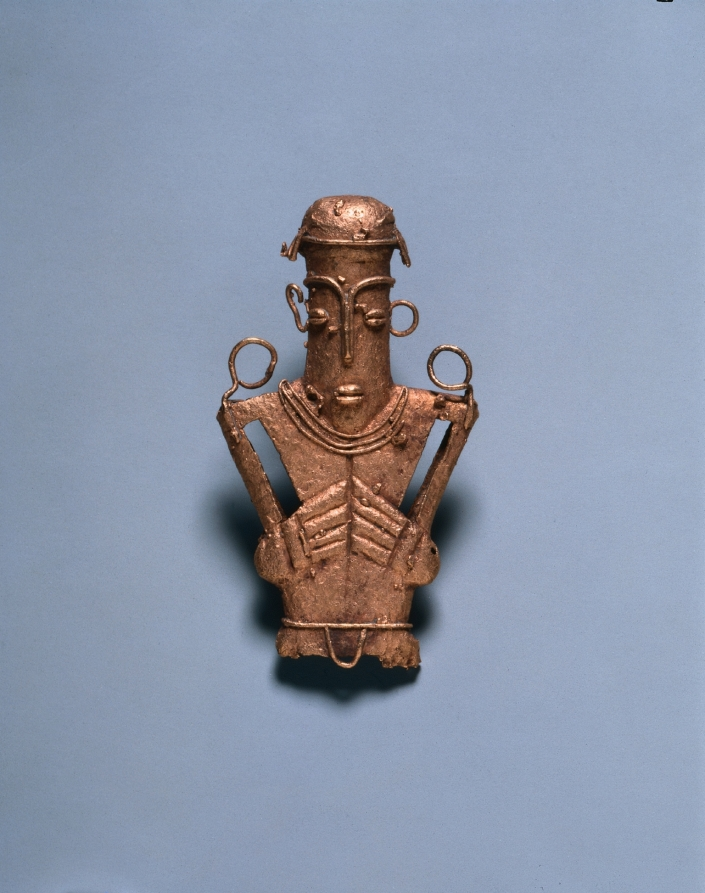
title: Tunjos (Votive Offering Figurine)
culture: Colombia, Muisca style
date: c. 900–1550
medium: cast gold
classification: Metalwork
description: Unlike the other gold ornaments in this gallery, tunjos were not worn; instead, they served as offerings that were deposited in sacred places, such as lagoons and caves. They often depict humans who hold something-here a container with a head (1947.22), a spear thrower (1947.19), and a bird-tipped (1957.25). The subject must have corresponded to a benefit being asked from the gods. Perhaps because they were not meant for display, tunjos were not finished after lost-wax casting. Flaws remain uncorrected, surfaces are unpolished, and gold that backed into the sprue (pouring channel) was left in place, creating the button-like form at the bottoms of 1947.24 and 1947.17, which were cast upside down.